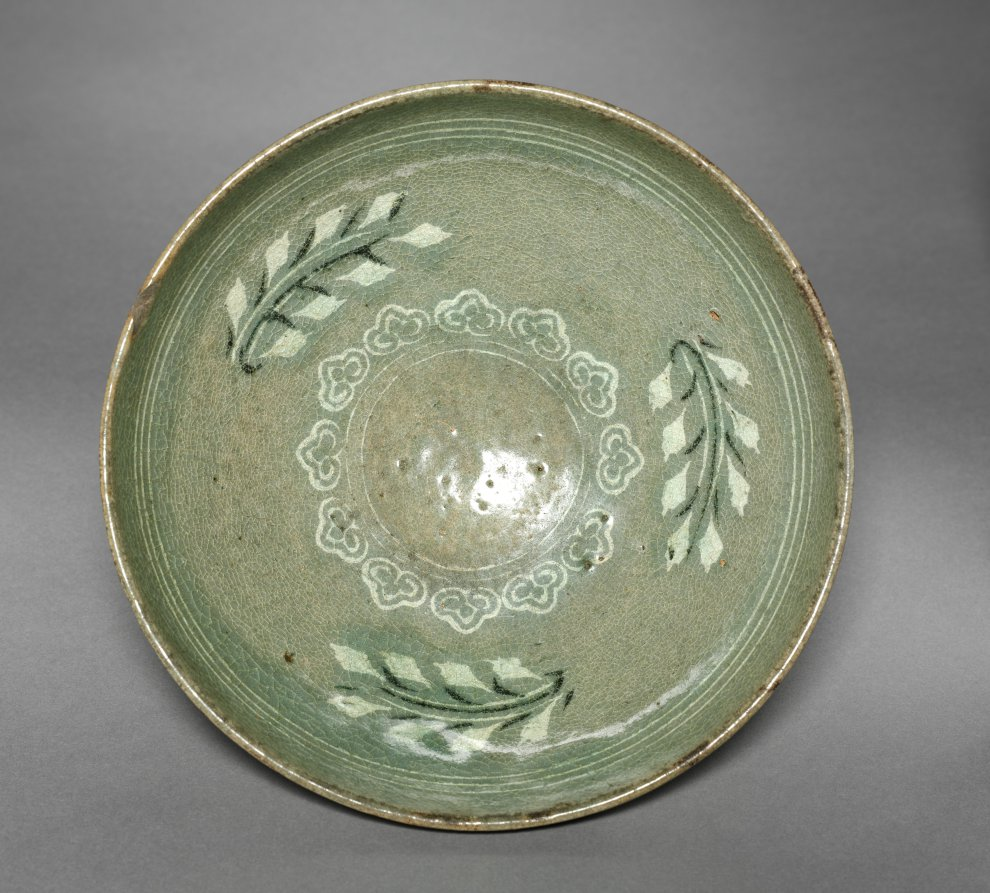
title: Dish with Inlaid Plant Design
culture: Korea, Goryeo dynasty (918–1392)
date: 1300s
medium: celadon with inlaid design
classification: Ceramic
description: As early as the 600s, the practice of drinking tea and wine became an important part of elite leisure culture in Korea. A wide bowl like this example was especially suitable for drinking powdered tea shaved from a compressed tea cake, the most commonly enjoyed type during the Goryeo period. The inlaid image of bloomed white flowers on the inner wall of this tea bowl must have made the moment of drinking tea more enjoyable.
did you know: The transparent greenish and bluish glaze of Goryeo celadons, shown in this bowl, is the result of distinctive small and long Korean kilns, which maintained a low oxygen saturation with a high level of carbon dioxide.